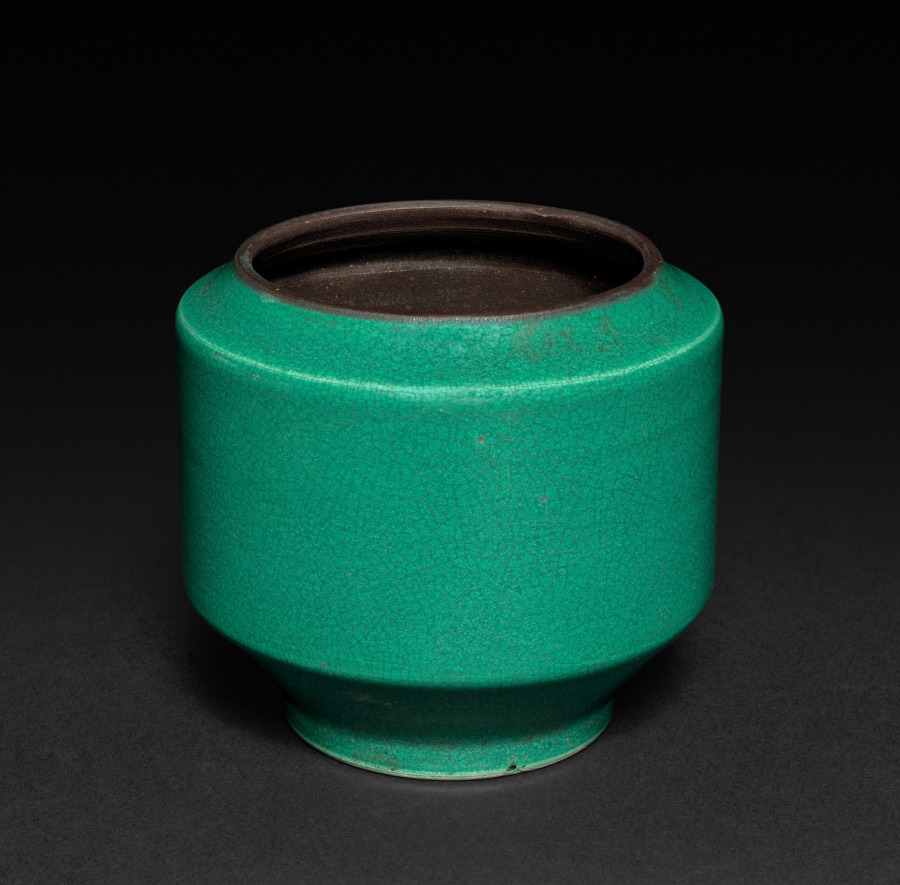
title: Camellia-Leaf-Green Cylindrical Vase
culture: China, Qing dynasty (1644-1911), Kangxi reign (1661-1722)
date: 1661–1722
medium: porcelain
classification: Ceramic